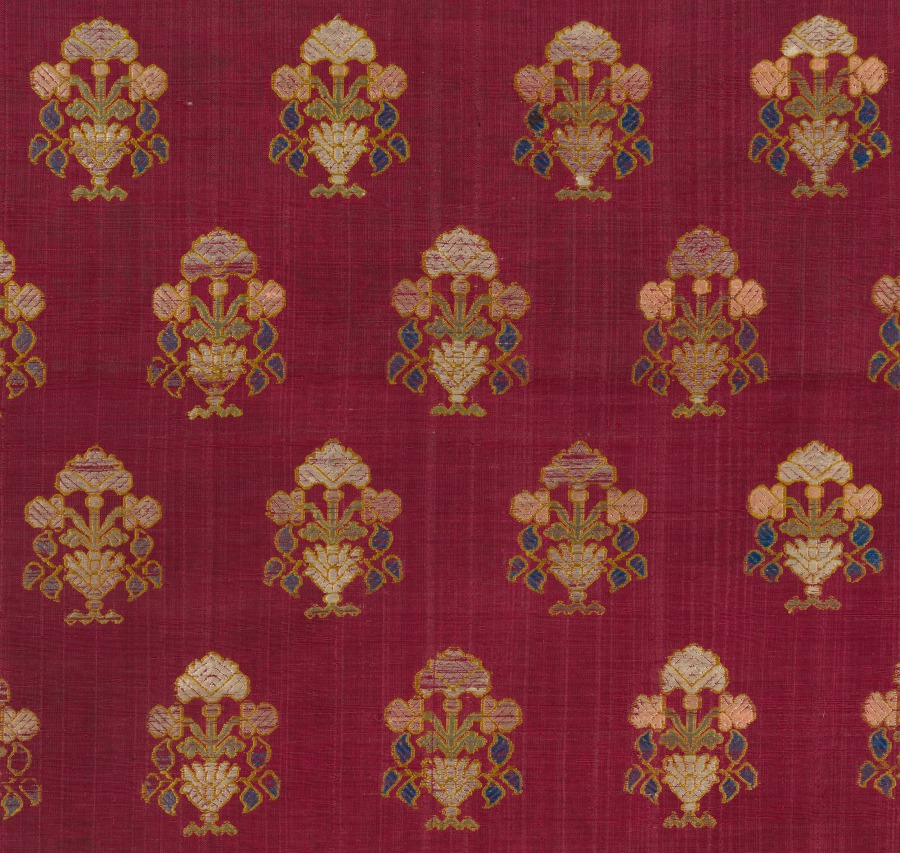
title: Brocade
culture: India, Surat, 18th or 19th century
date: 1700s or 1800s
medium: brocade, "himru"; silk and cotton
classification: Textile